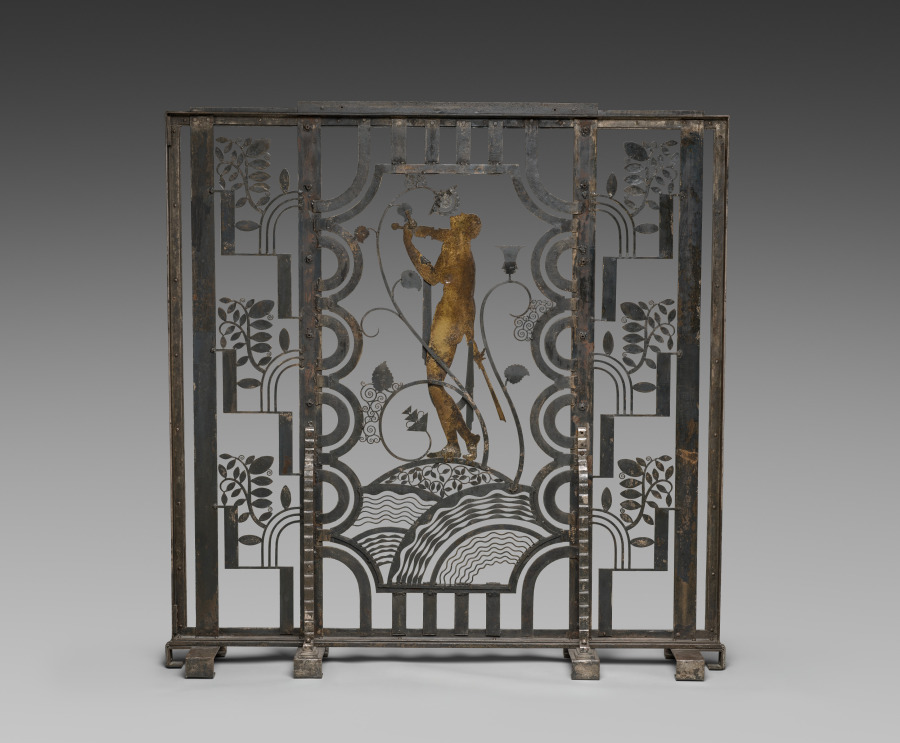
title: Muse with Violin Screen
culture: America, Ohio, Cleveland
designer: Paul Fehér (American, born Hungary, 1898–1990)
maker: Rose Iron Works (America, Ohio, Cleveland, est. 1904)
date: 1930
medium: Steel, brass; silver and gold plating, cotton velveteen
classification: Metalwork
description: Since the early years of the 20th century, the Rose Iron Works, a Cleveland supplier of architectural ornament, has produced distinguished metalwork. The company’s founder, Martin Rose, was born in Austria-Hungary and studied ornamental metalsmithing in Vienna prior to immigrating to Cleveland in 1902. In the 1920s, he hired a talented young Parisian designer, Paul Fehér, to work for the firm. Fehér’s designs, culminating in this massive screen, brought a modern European sensibility to the Rose Iron Works production. With its geometric patterning, highly stylized and abstracted natural forms, and the central figure reminiscent of the celebrated jazz singer Josephine Baker, this screen reflects the classic motifs of Art Deco design.